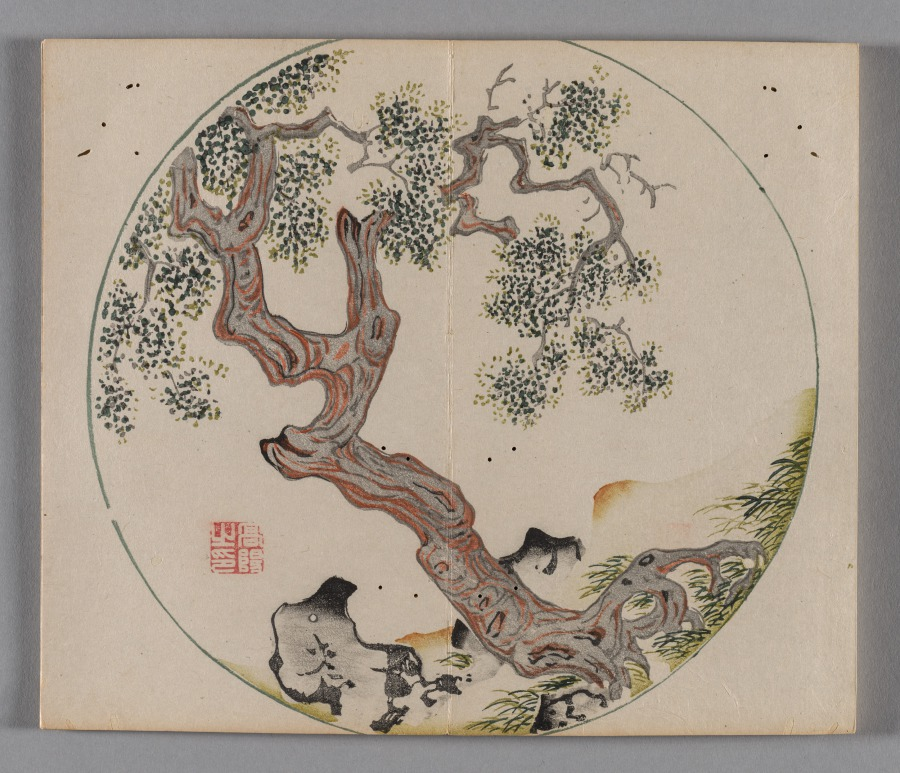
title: Ten Bamboo Studio Painting and Calligraphy Handbook (Shizhuzhai shuhua pu): Round Fans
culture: China, Qing dynasty (1644-1911)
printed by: Hu Zhengyan (Chinese, c. 1584–1674)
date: 1633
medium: Woodblock-printed book; ink and colors on paper; first edition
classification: Print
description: Color printing reached a level of perfection in the early 1600s, as seen in this Ten Bamboo Studio Collection of Calligraphy and Painting and the Mustard Seed Garden Manual of Painting (printed 1679 and 1701). The painterly quality, precision in registering (aligning) the woodblocks, and harmonious colors made them the most successful color print editions in Chinese history. Both editions were printed and compiled in Nanjing, spread nationwide, and had a great impact on the arts in Japan and Korea.